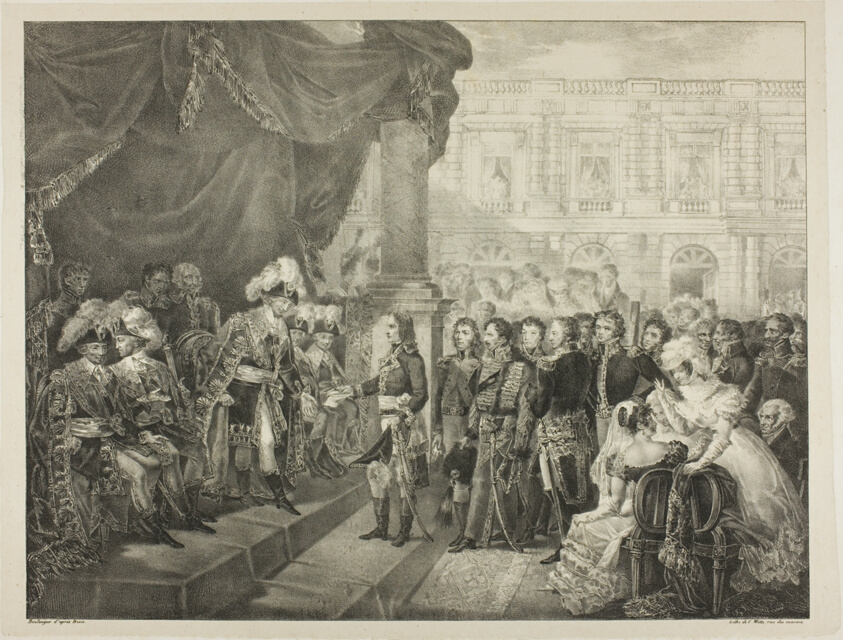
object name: Print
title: Reception by the Directory, plate 29 from The Political and Military Life of Napoleon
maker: Louis Boulanger (French, 1806-1867); after Jean François Bosio (French, 1764-1827); printed by Charles Étienne Pierre Motte (French, 1785-1836); A. V. Arnault (French, born 1822)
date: 1822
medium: Lithograph in black on cream China paper laid down on white wove paper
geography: France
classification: lithograph; print; prints and drawing